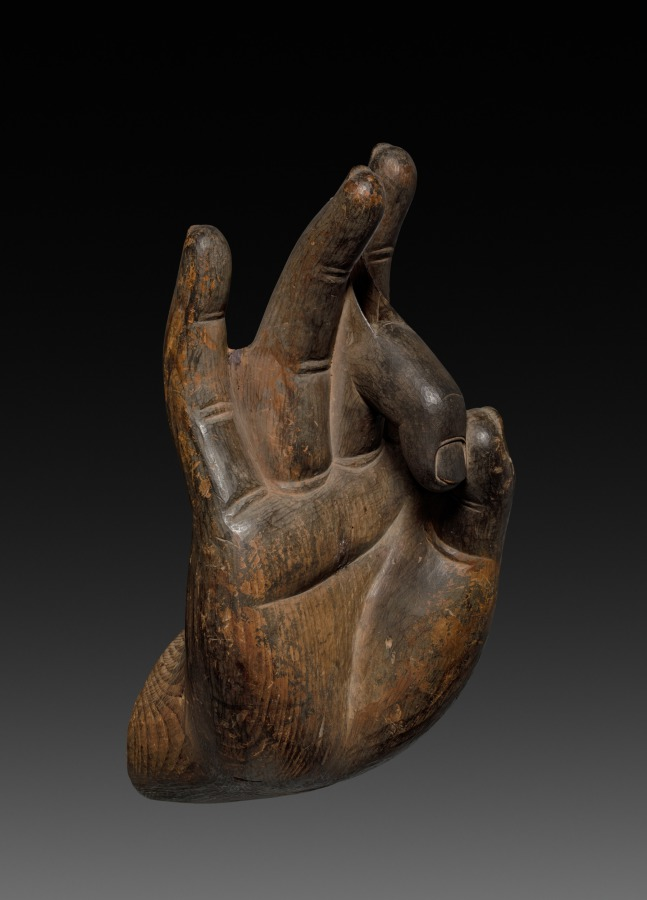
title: Hand of Buddha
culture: Japan, Nara period (710–94)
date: late 700s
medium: wood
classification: Sculpture